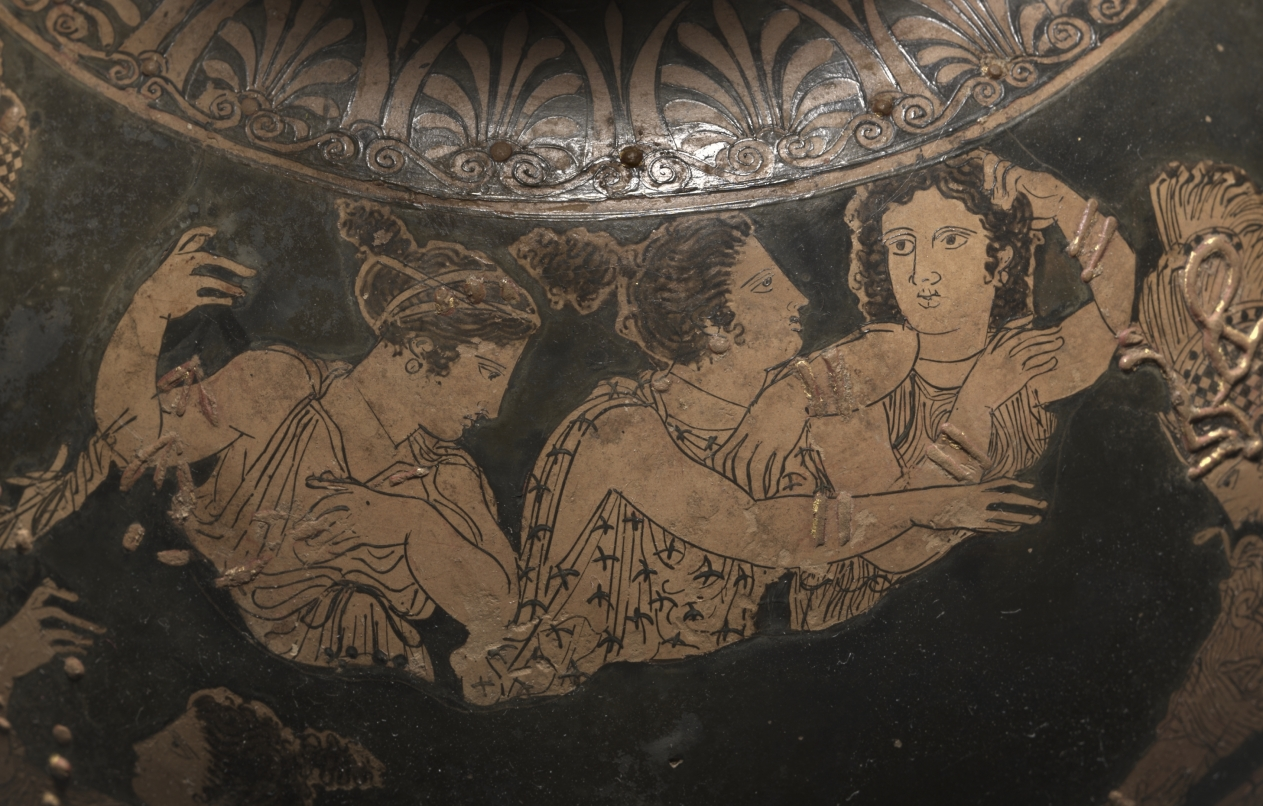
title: Red-Figure Squat Lekythos (Oil Vessel): Birth of Erichthonios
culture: Greek, Attic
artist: attributed to Meidias Painter (Greek, Attic, active c. 420–400 BCE)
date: c. 420–410 BCE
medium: ceramic, with gilding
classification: Ceramic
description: The central group on this vase shows the seated earth goddess Ge (also known as Gaia) handing her baby, Erichthonios, to Athena. Conceived from the seed of Hephaistos, Erichthonios would go on to become a king of Athens, and the story of his birth became popular in Athenian art of the fifth century BC. Other representations include Hephaistos as well as Kekrops, the mythical first king of Athens, sometimes together with Zeus and other deities. But this one includes only female onlookers—likely the three daughters of Kekrops watching from above, with Aphrodite and several abstract personifications such as Peitho (Persuasion) and Eudaimonia (Happiness) standing and seated nearby.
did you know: A lead rivet sits at the junction of handle and neck, probably an ancient repair.